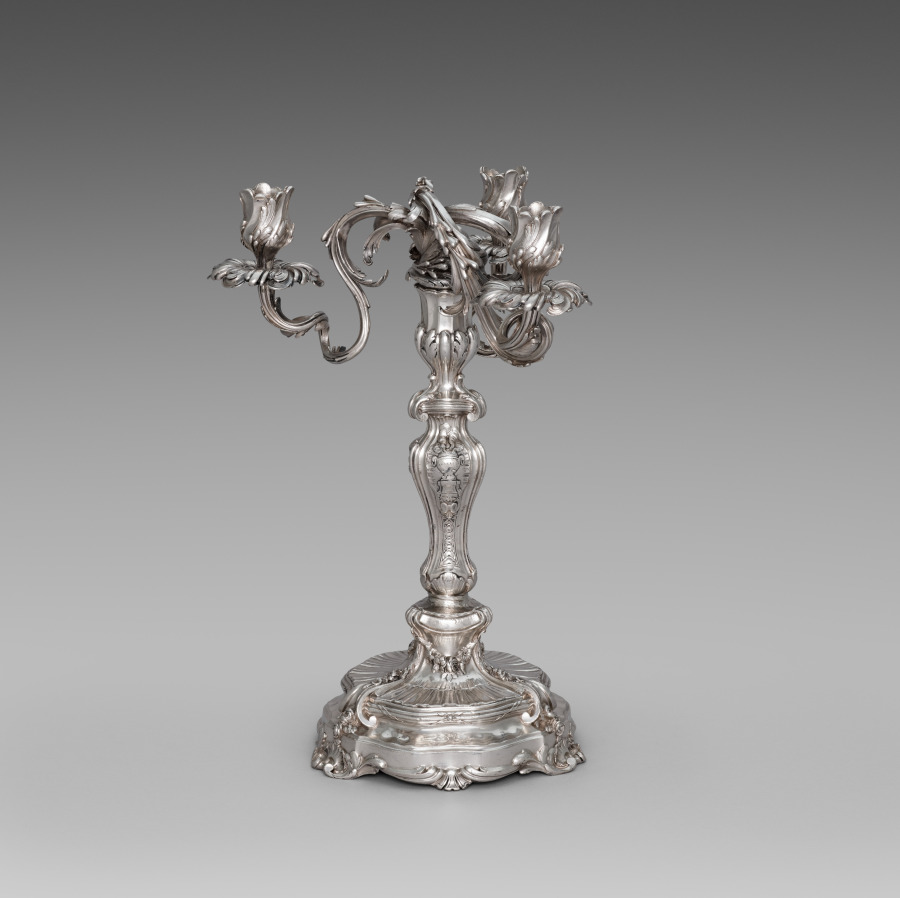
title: Candelabrum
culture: France, Paris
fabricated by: François Thomas Germain (French, 1726–1791)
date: 1757–1758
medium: silver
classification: Silver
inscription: [Maker’s mark of Francois-Thomas Germain, beneath base]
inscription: [Charge mark of Eloy Brichard, 1756−1762, beneath base]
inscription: [Warden's mark For Paris, 1757−1758, beneath base]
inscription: [Discharge mark for work intended for export, 1756−1775, beneath base]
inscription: [Discharge mark for work intended for export, 1756−1775, on base]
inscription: [Hallmarks for Saint Petersburg, on base]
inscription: [Assay mark of Ivan Frolov, on base]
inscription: [Russian standard of the French silver, on base]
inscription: [Maker’s mark of Francois-Thomas Germain, master silversmith on October 16, 1748, beneath drip pan of each three bobeches]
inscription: [Charge Mark Of Eloy Brichard, 1756−1762, beneath drip pan of each three bobeches]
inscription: [Discharge mark for work intended for export, probably 1733−1775, beneath drip pan of each three bobeches]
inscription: [Warden's mark for Paris, 1757-1758, beneath drip pan of each three bobeches]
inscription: [Russian standard of the French silver, beneath drip pan of one of three bobeches]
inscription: [Assay mark of Ivan Frolov, beneath drip pan of one of three bobeches]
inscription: [Charge mark for large work of Eloy Brichard, 1756−1762, on bayonet attachment of candelabra]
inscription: [Warden's mark for Paris, 1757-1758, on bayonet attachment of candelabra]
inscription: [Illegible mark in a square, on one bobeche]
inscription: [Engraved beneath base]: “Fait. Par. F. T. Germain. Sculp[teu]r. Orf[ev]re. Du Roy. Aux. Galleries. Du Louvre. A Paris- 1758”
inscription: [Engraved beneath base]: "Du no. 31"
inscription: [Beneath base]:"No 463"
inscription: [Russian Imperial Coat-of-arms, engraved beneath base]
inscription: [Modern inscription with black ink, beneath base]: "L5 ... 51/w-8"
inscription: [Modern inscription (illegible) in a rectangular paper label on the base, engraved. Cipher composed with two “M”’s (?) surmounted by a royal crown]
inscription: [Engraved on candelabra bayonet attachment]: "No 463"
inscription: [On candelabra bayonet attachment]: "du No 31"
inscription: [Engraved cipher with two "M"s (?) surmounted by a royal crown, on one bobeche]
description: This candelabrum is part of a pair. Its design blurs the line between function and decoration. The arms twist and curve, visually flower stems while physically supporting the candles. Though this visual unity is typical of the rococo style, the influence of the rising neoclassical style is evident in the allegorical scenes of light that decorate each candelabra’s stem.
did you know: These candelabra are part of a dinner service sent from Paris, France to Saint-Petersburg, Russia in two separate shipments, the first of which contained 270 objects for 8 dozen place settings.